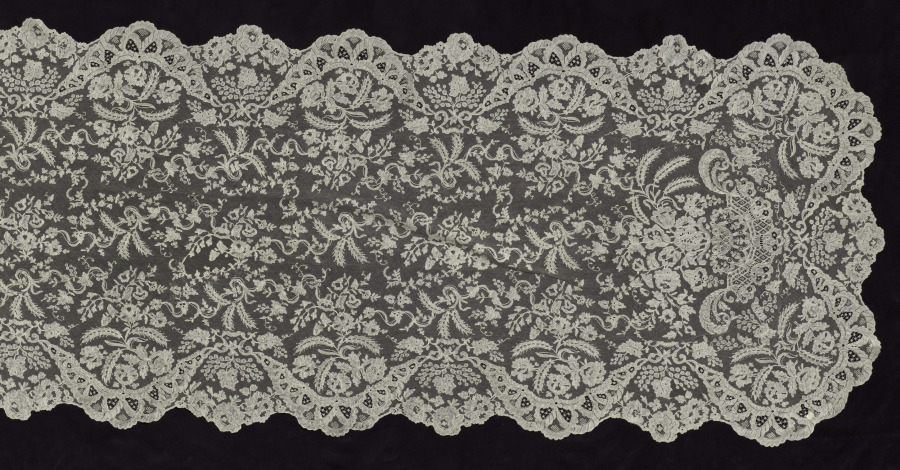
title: Lace Scarf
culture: France, Lille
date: late 1800s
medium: Linen: bobbin lace (blonde lace)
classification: Lace